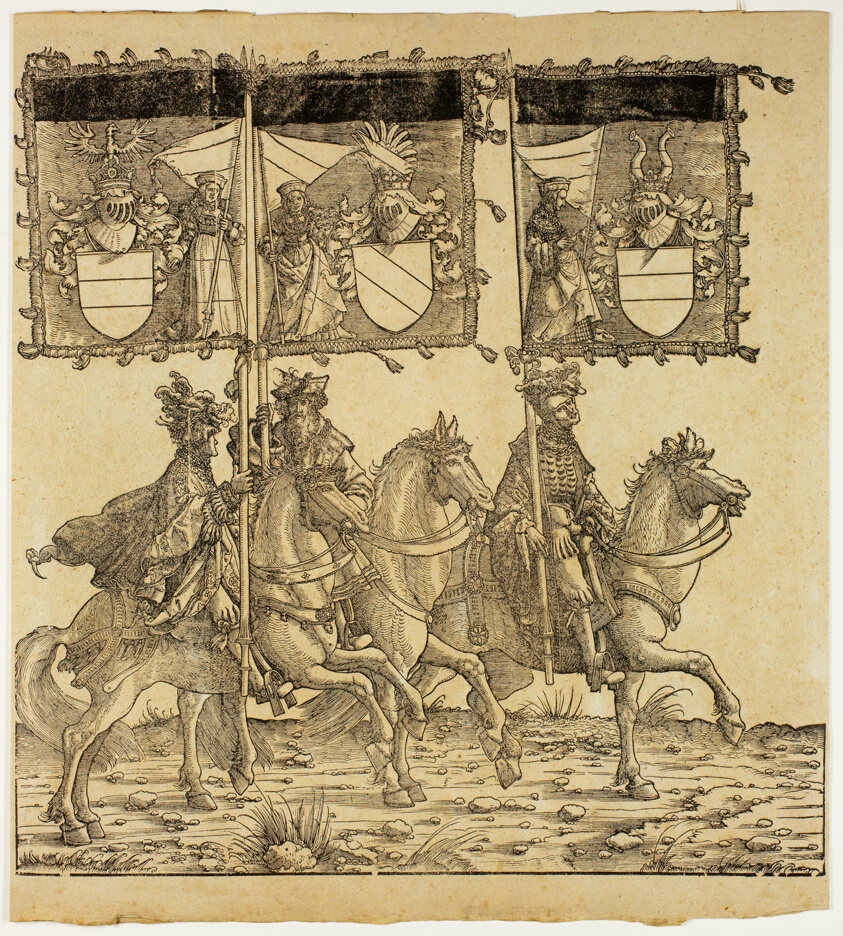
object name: Print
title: Triumph of Maximilian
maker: Hans Burgkmair, the elder (German, 1473-1531)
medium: Woodcut on paper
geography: Germany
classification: print; prints and drawing